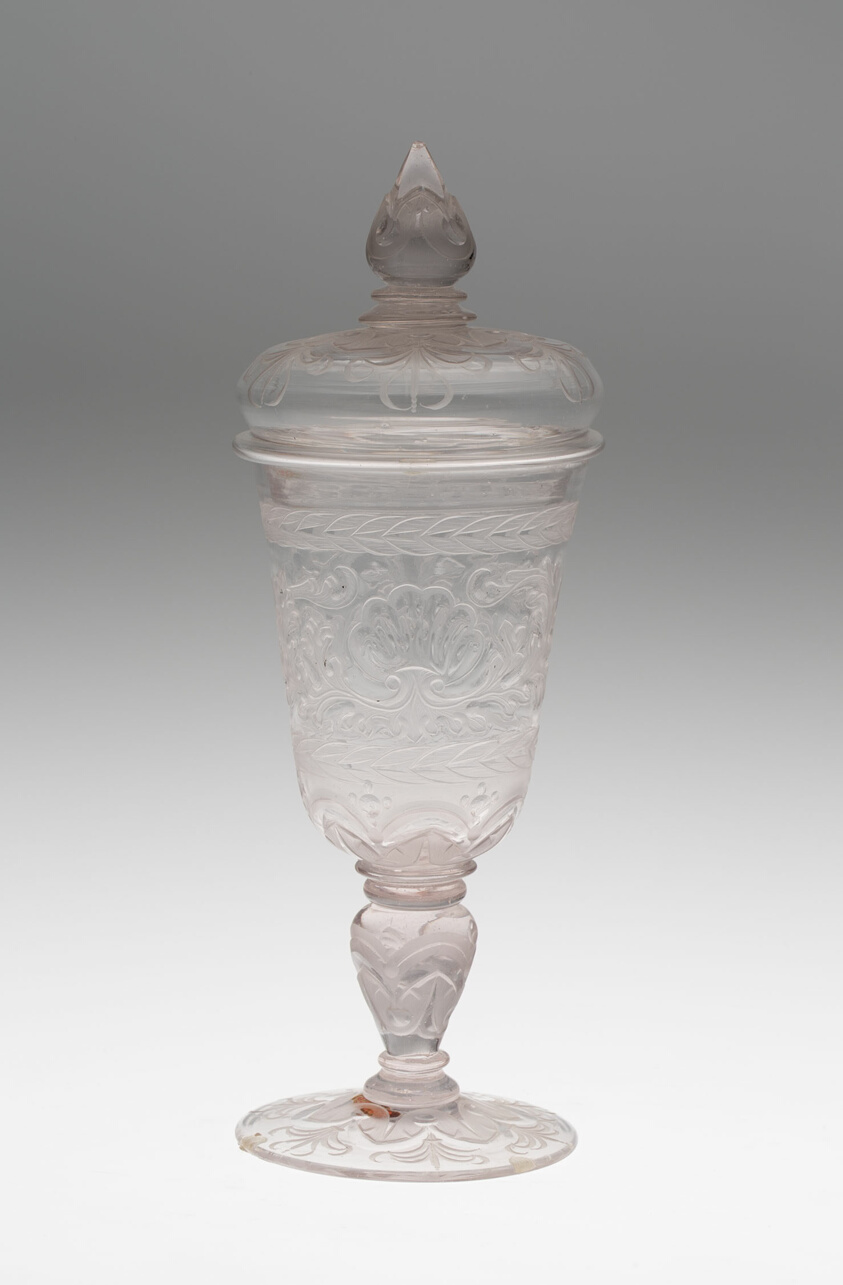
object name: Glass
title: Goblet with Cover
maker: Germany, Schleswig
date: Early 18th century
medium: Glass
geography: Schleswig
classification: drinking vessel; glass; european decorative arts